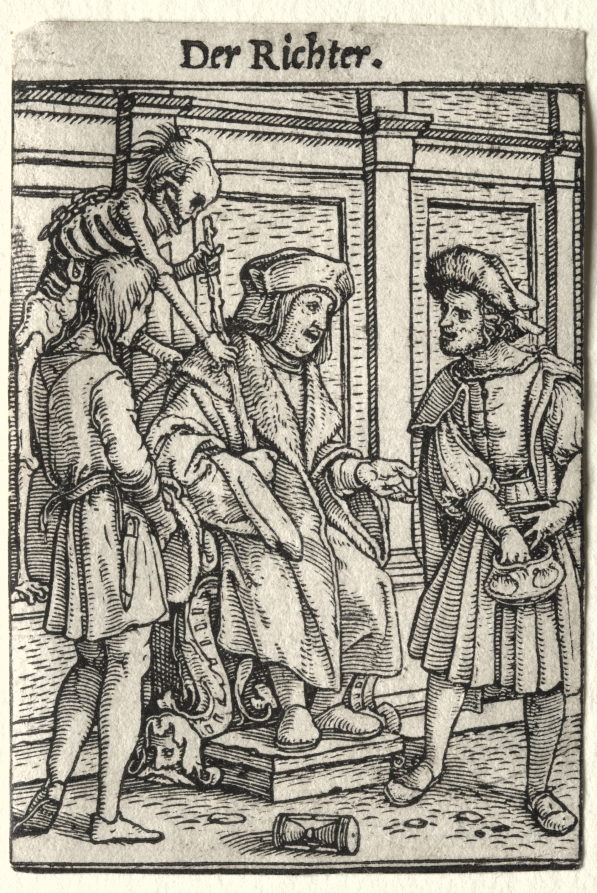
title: Dance of Death: The Judge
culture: Germany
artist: Hans Holbein the Younger (German, active England and Switzerland, 1497/98–1543)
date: c. 1526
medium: woodcut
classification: Print